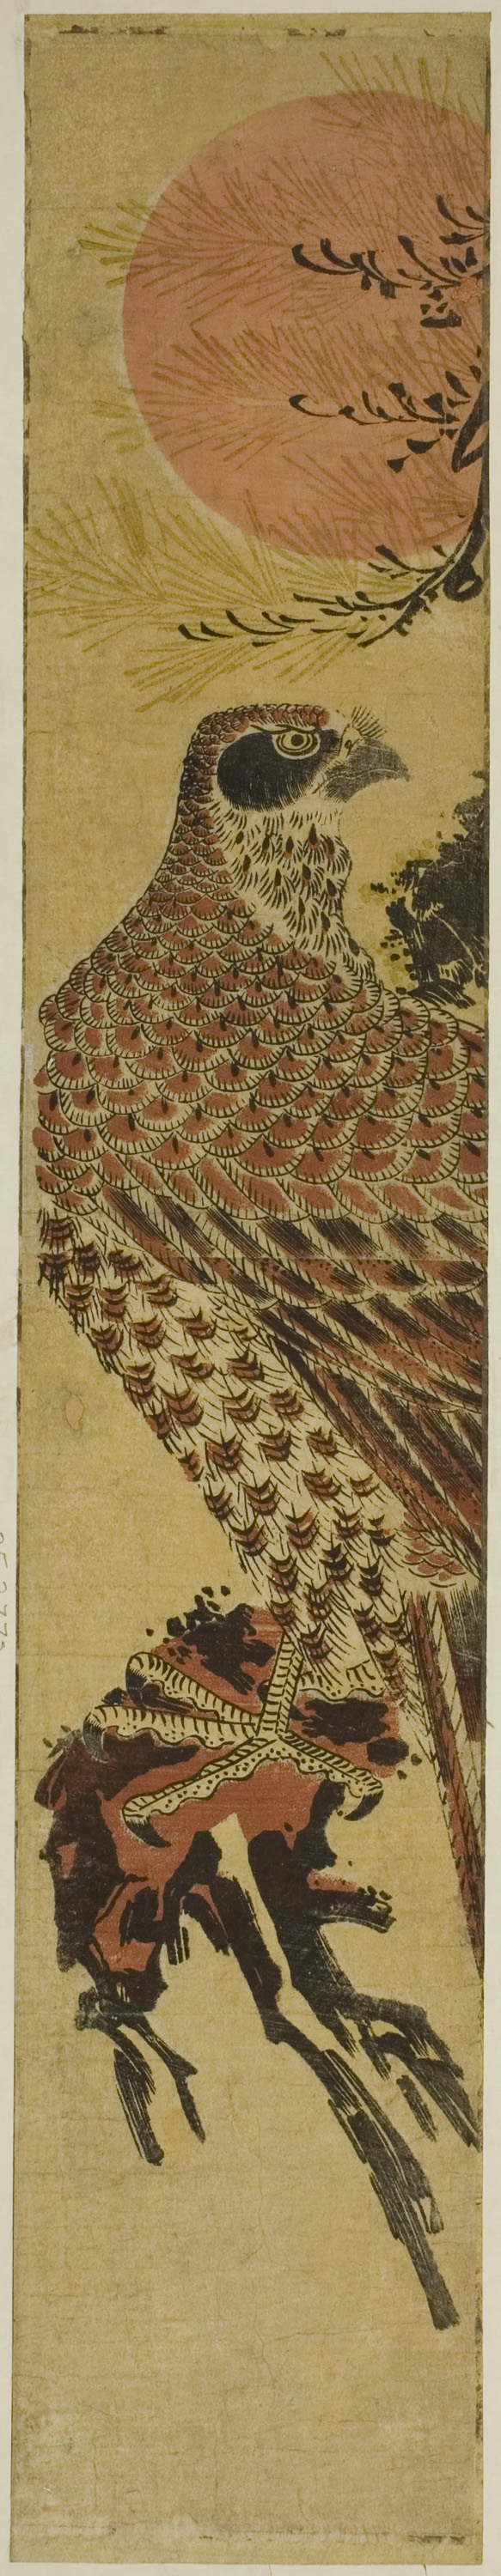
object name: Print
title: Falcon at Sunrise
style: Japanese (culture or style)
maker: Attributed to Isoda Koryusai; Japanese, 1735–1790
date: c. 1775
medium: Color woodblock print; hashira-e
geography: Japan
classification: woodblock print; print; asian art